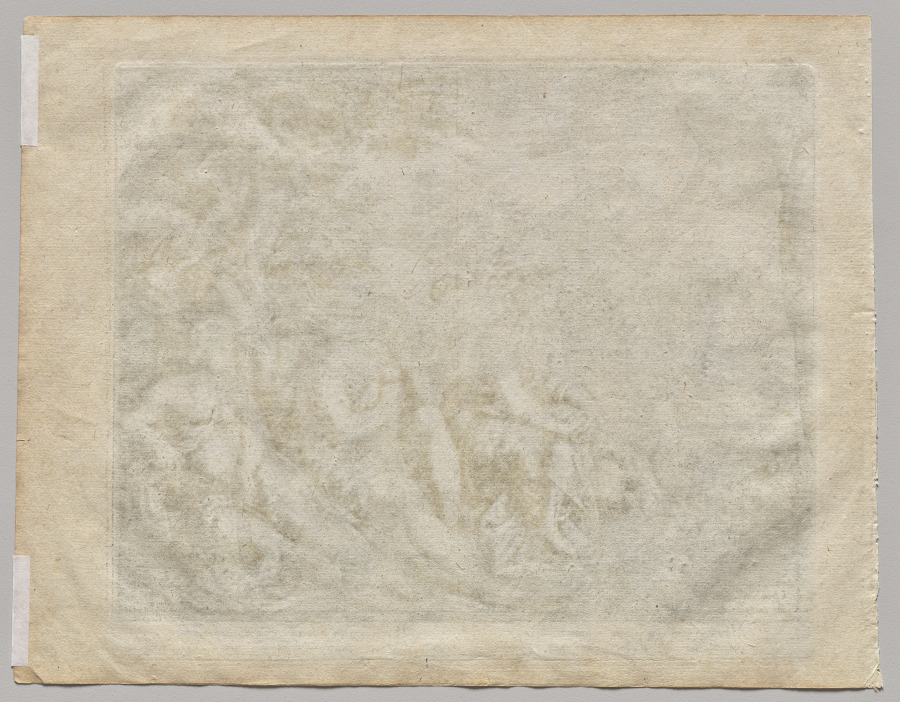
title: The Seed Falling by the Wayside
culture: Netherlands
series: Parable of the Sower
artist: Philip Galle (Flemish, 1537–1612)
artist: after Gerard van Groeningen (Flemish)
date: 1574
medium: engraving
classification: Print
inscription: Watermark: “SN”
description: This is one of a series of four prints portraying the biblical parable of the sower, made in Antwerp (in present-day Belgium) at the end of the 1500s. The parable compares types of soil to people in the world: one hardened; one fickle; one distracted by things of the world; and one with an open heart, ready to accept God. In this image of the sower hardened to the word of God, the man has fallen asleep beside the field while a small devil steals the word of God from his heart.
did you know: Two allegorical figures, Negligence and Sluggishness, seated at either side of the sleeping sower indicate two sources of his problems.